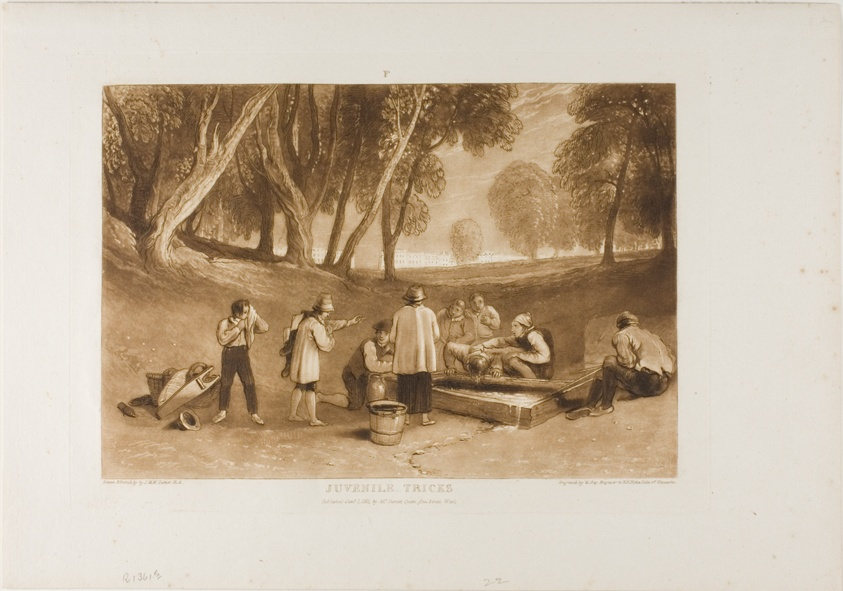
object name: Print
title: Juvenile Tricks, plate 22 from Liber Studiorum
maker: Joseph Mallord William Turner (English, 1775-1851); Engraved by William Say (English, 1768-1834)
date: published January 1, 1811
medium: Etching and engraving in brown on ivory wove paper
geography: England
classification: etching; print; prints and drawing